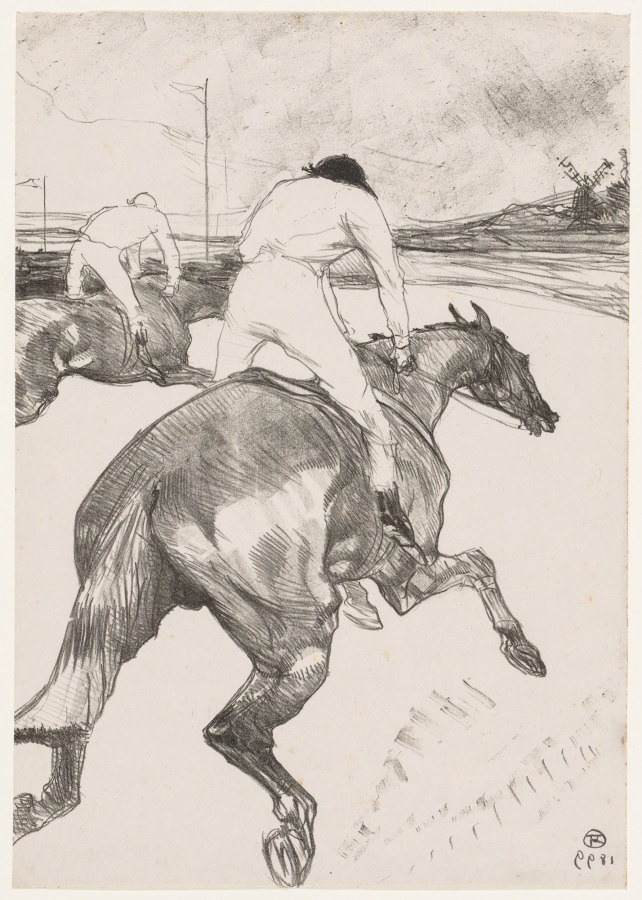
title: The Jockey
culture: France, 19th century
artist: Henri de Toulouse-Lautrec (French, 1864–1901)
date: 1899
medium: lithograph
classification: Print